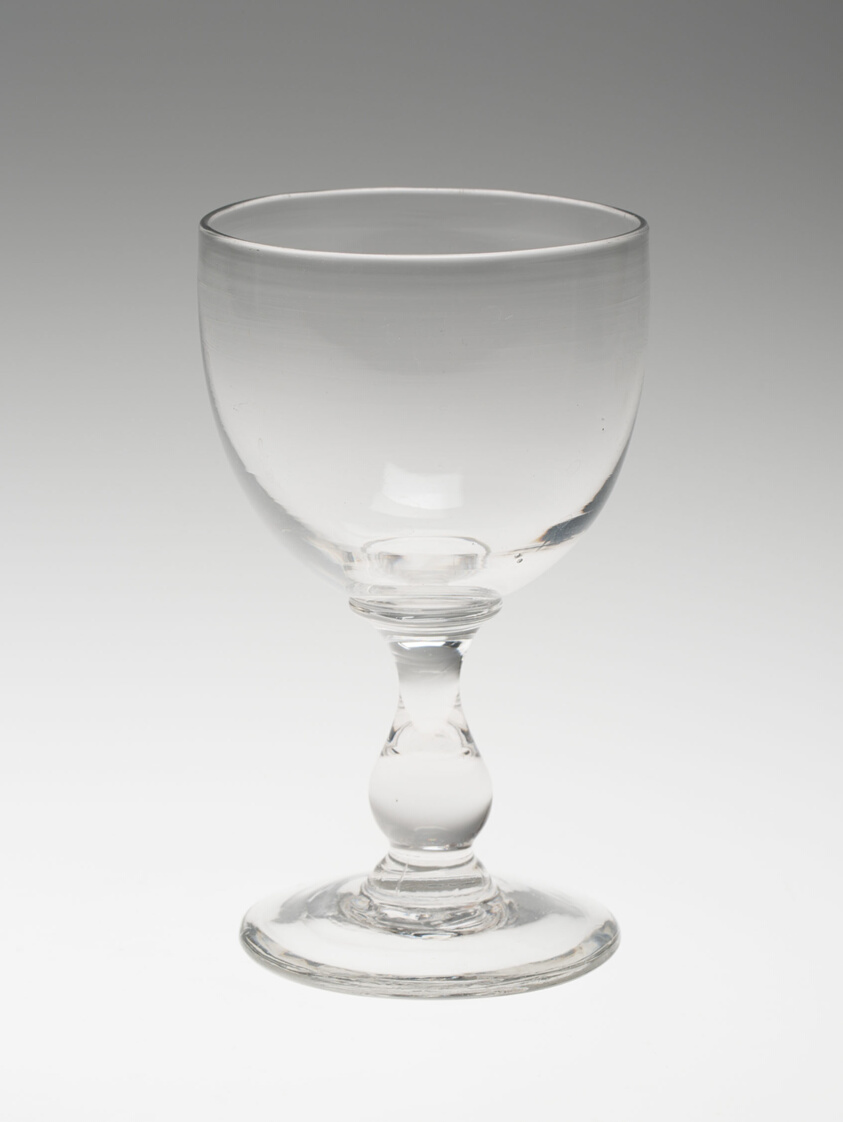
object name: Glass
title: Rummer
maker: England; Possibly made by John Davenport, Brierley Hill, Stroubridge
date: 1800/50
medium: Glass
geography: England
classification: glass